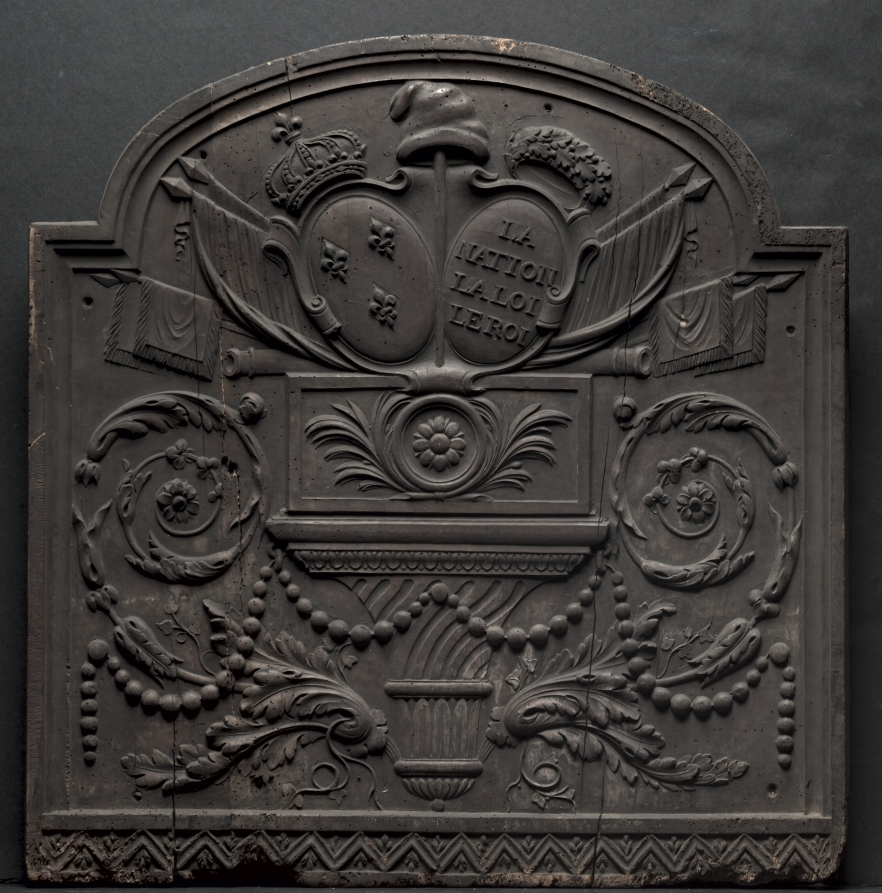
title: Carved Wood Panel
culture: France, 18th century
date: 1700s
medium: wood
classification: Furniture and woodwork